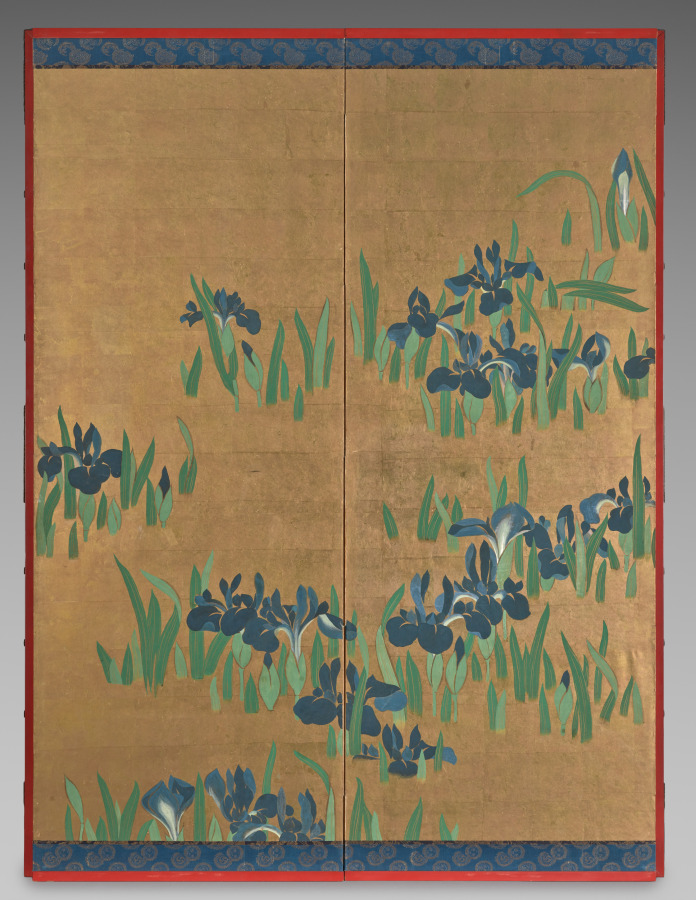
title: Irises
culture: Japan, Edo period (1615–1868)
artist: Watanabe Shikō (Japanese, 1683–1755)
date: 1700s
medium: One of a pair of six-panel folding screens, ink and color on gilded paper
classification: Painting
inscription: signed and sealed lower left of the first panel from the left.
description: The subject of this painting comes from a 10th-century text. It tells of a young nobleman’s journey into the lonely countryside, far from the capital city of Heian-kyō (Kyoto). There he came upon a small stream, the banks of which were covered with blooming irises, on which the artist has chosen to focus our attention. While viewing the beautiful flowers the nobleman composed a poem: I have a beloved wife, Familiar as the skirt of a well-worn robe, And so this distant journeying Fills my heart with grief.